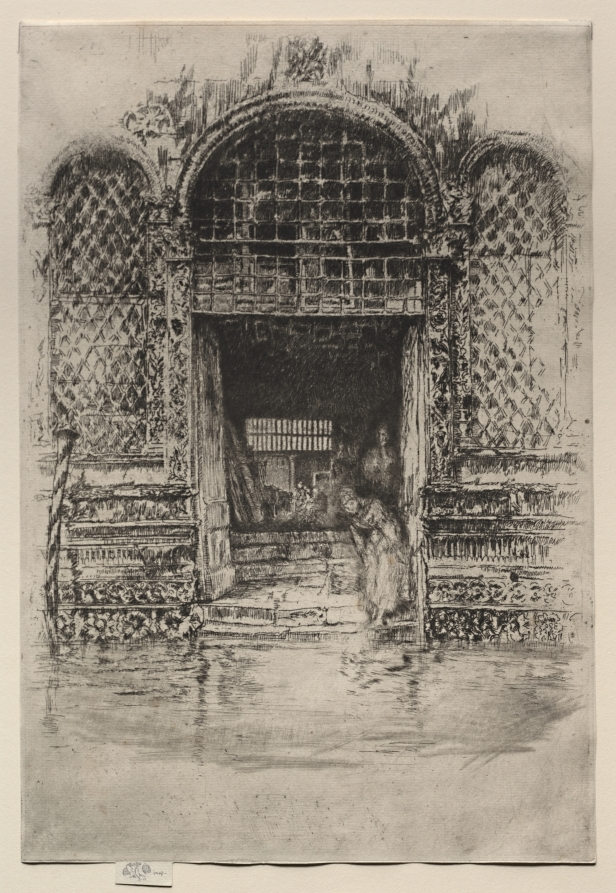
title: The Doorway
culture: America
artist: James McNeill Whistler (American, 1834–1903)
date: 1880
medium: etching, drypoint and roulette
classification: Print